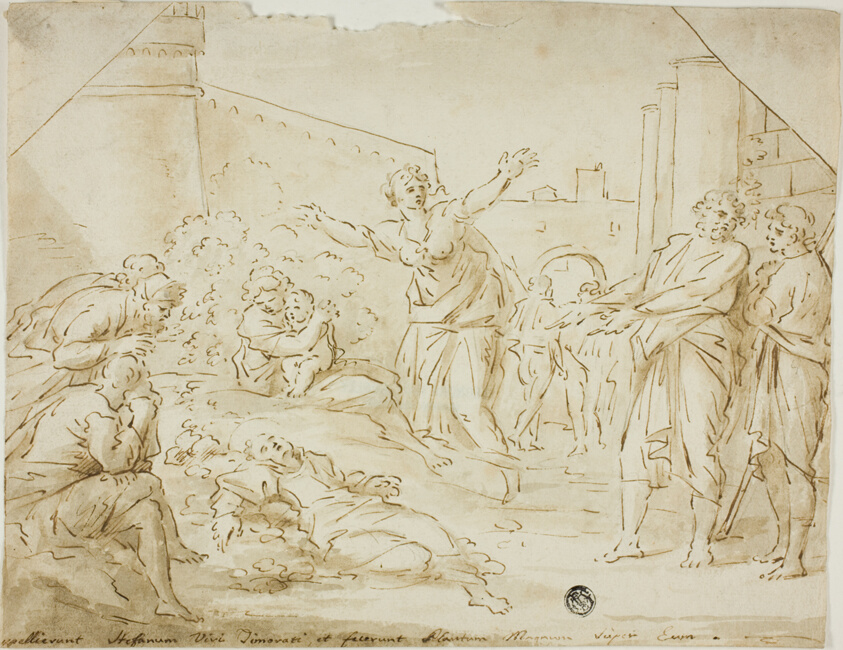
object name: Drawing and Watercolor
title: Mourning over the Body of Saint Stephen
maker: After Annibale Carracci; Italian, 1560-1609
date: 1604/1799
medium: Pen and brown ink, with brush and brown wash, over black chalk, on ivory laid paper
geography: Italy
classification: pen and ink drawings; drawings (visual works); prints and drawing